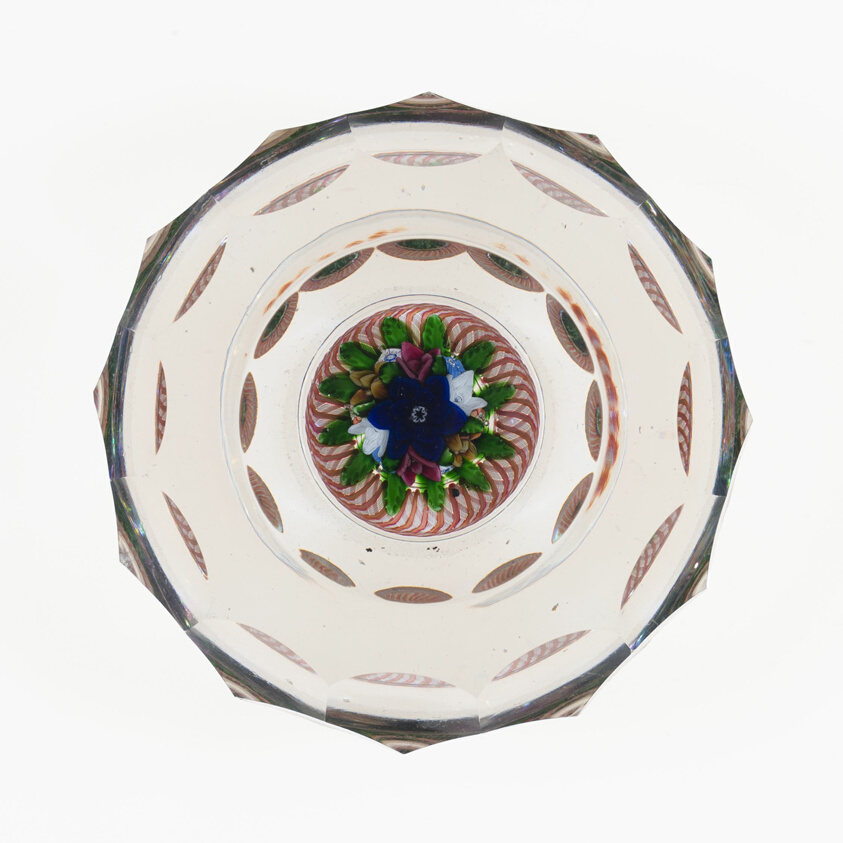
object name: Glass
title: Paperweight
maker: Saint-Louis Glassworks (Cristalleries de Saint-Louis); Lorraine, France, founded 1586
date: c. 1848–55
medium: Glass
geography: Saint-Louis-lès-Bitche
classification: paperweight; glass